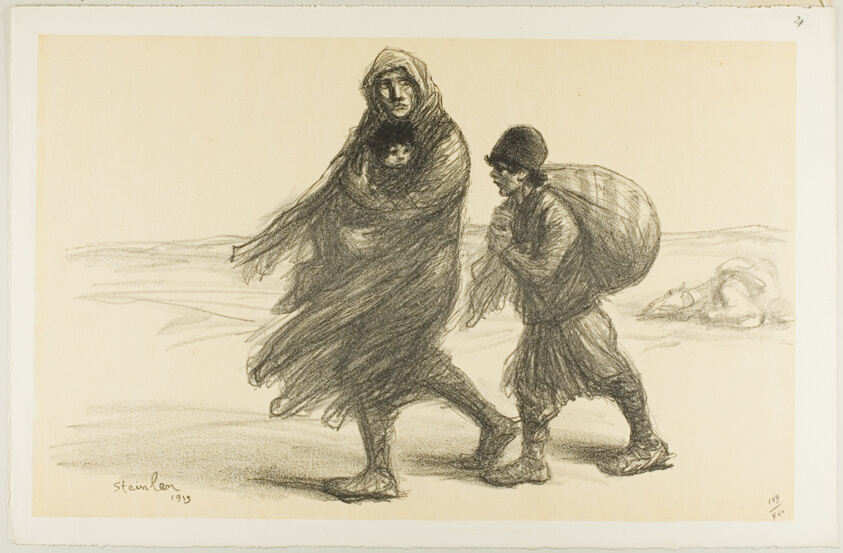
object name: Print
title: Serbian Exodus, plate twenty-one from Actualités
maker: Théophile-Alexandre Steinlen; French, born Switzerland, 1859-1923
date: 1915, published January 1916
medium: Lithograph in black over fawn tint on thick off-white wove paper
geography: France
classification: lithograph; print; prints and drawing